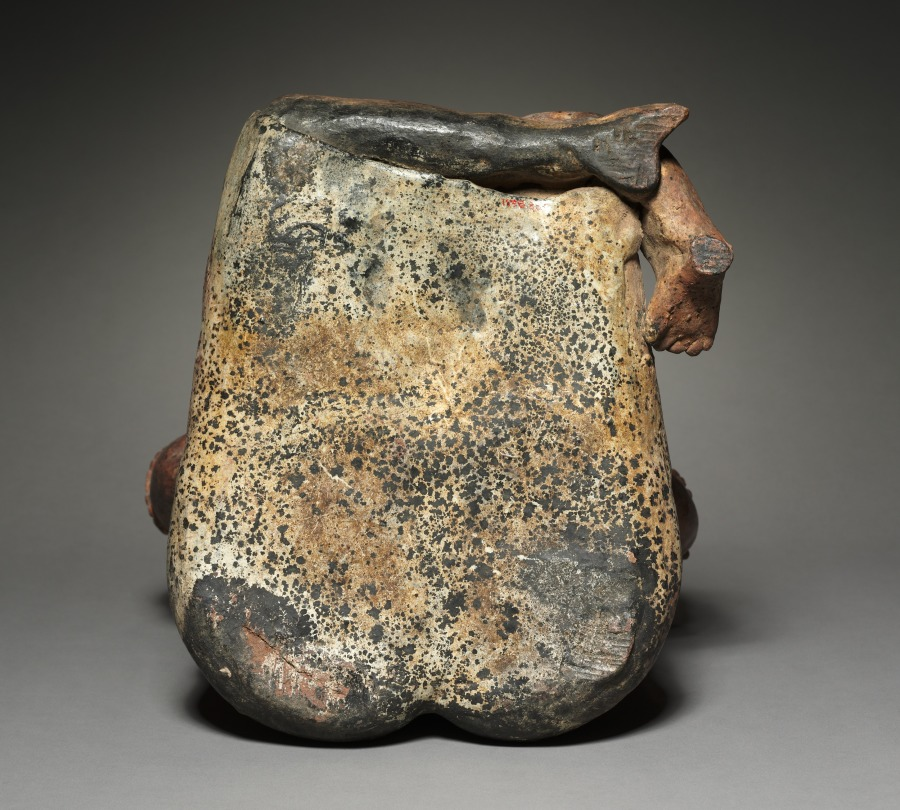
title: Female Seated Figure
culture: Mexico, Nayarit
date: 100 BCE–300 CE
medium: ceramic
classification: Ceramic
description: This couple-extremely fine examples of their kind-may commemorate the marriage of an important person, such as a chief, but could also represent siblings of a chiefly family. Whatever their relationship, their unity is conveyed by their physical similarities, including their jewelry, which marks high social station. The female is unusual in nursing an infant, likely a reference to generational renewal and the continuation of noble bloodlines. The significance of the male’s activity-beating a turtle-shell drum- is not understood.